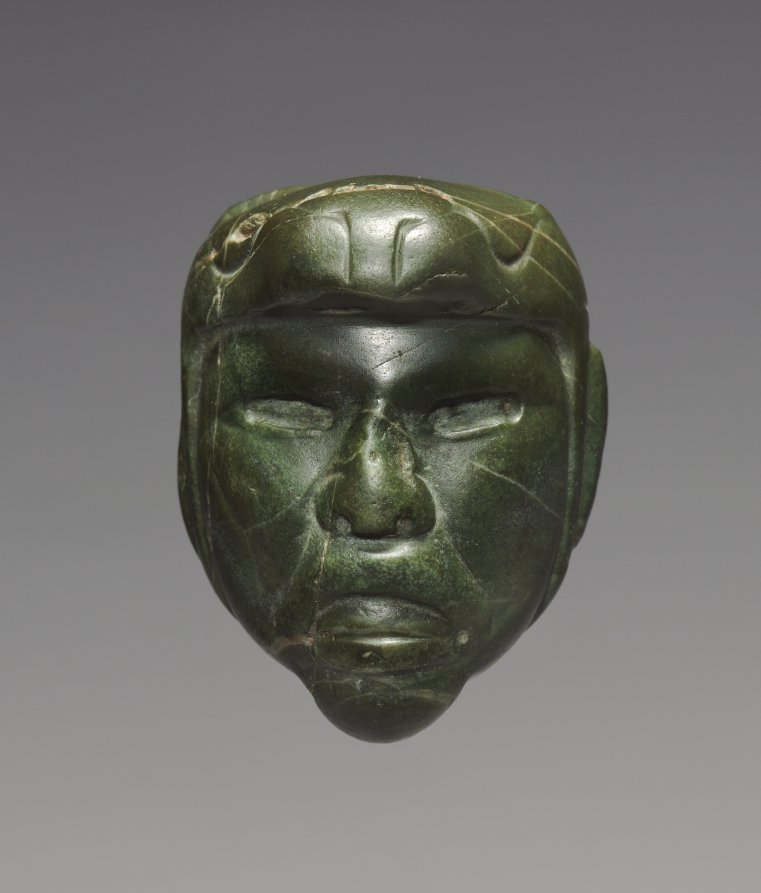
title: Head with Animal Headdress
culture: Mexico, Puebla, Matamoros region(?), Olmec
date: 900–300 BCE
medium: serpentine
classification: Sculpture